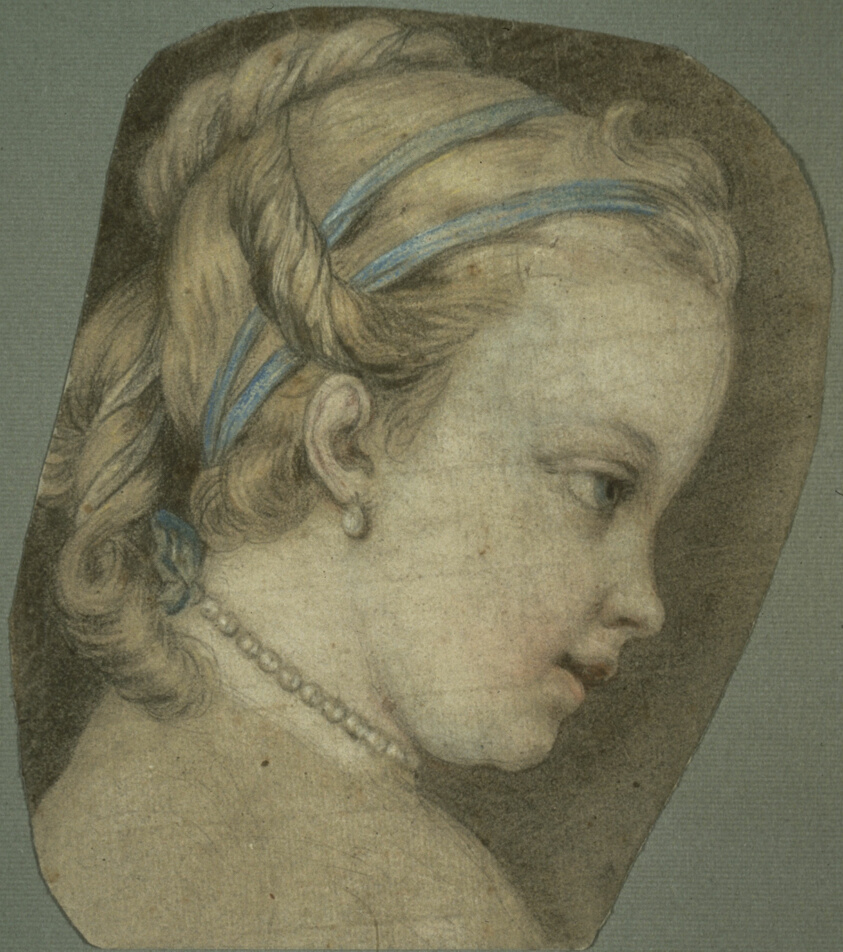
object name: Drawing and Watercolor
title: Young Girl Facing to the Right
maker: Carle van Loo (French, 1705-1765)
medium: Pastel, with touches of red chalk, over touches of graphite, on blue laid paper, laid down on blue laid paper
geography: France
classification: pastel; drawings (visual works); prints and drawing